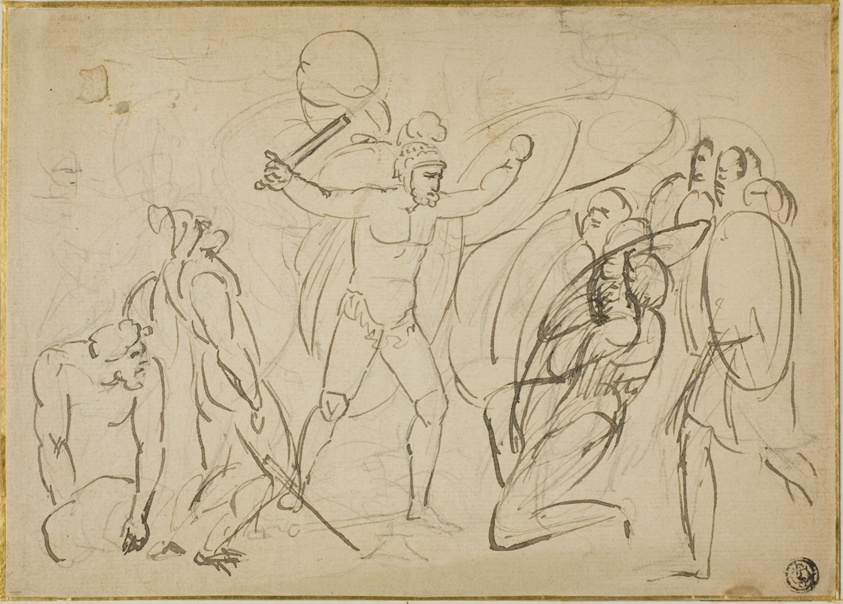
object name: Drawing and Watercolor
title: Classical Combat (recto); Sketch of Male Nude (verso)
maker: Possibly William Blake (English, 1757-1827); or Thomas Stothard (English, 1755-1834)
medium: Pen and black ink over graphite (recto), and graphite (verso), on tan laid paper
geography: England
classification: pen and ink drawings; drawings (visual works); prints and drawing